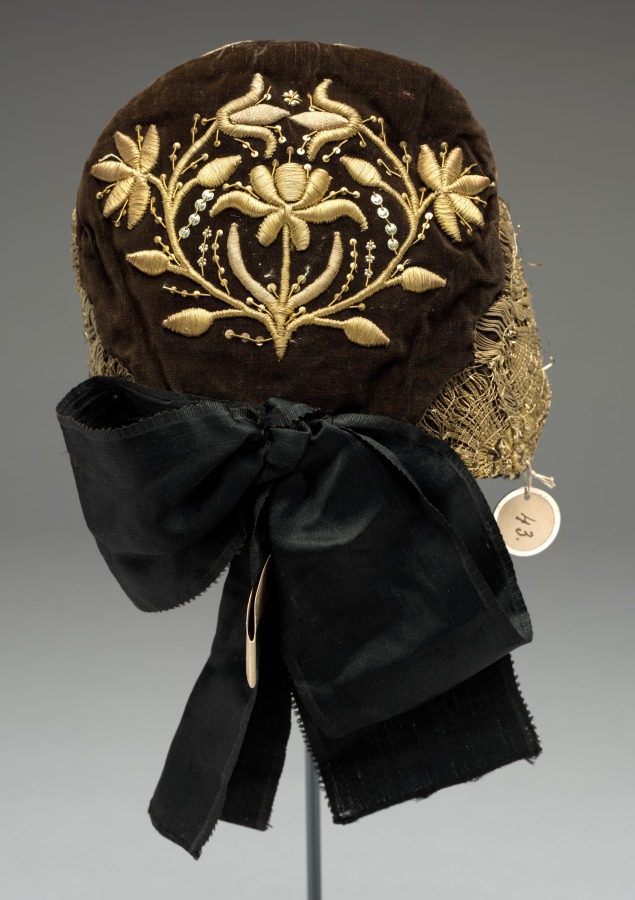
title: Embroidered Headdress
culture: Germany, Schleswig, 18th century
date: 1700s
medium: embroidery, velvet ground embroidered with gold and silver thread; edged with gold lace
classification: Garment